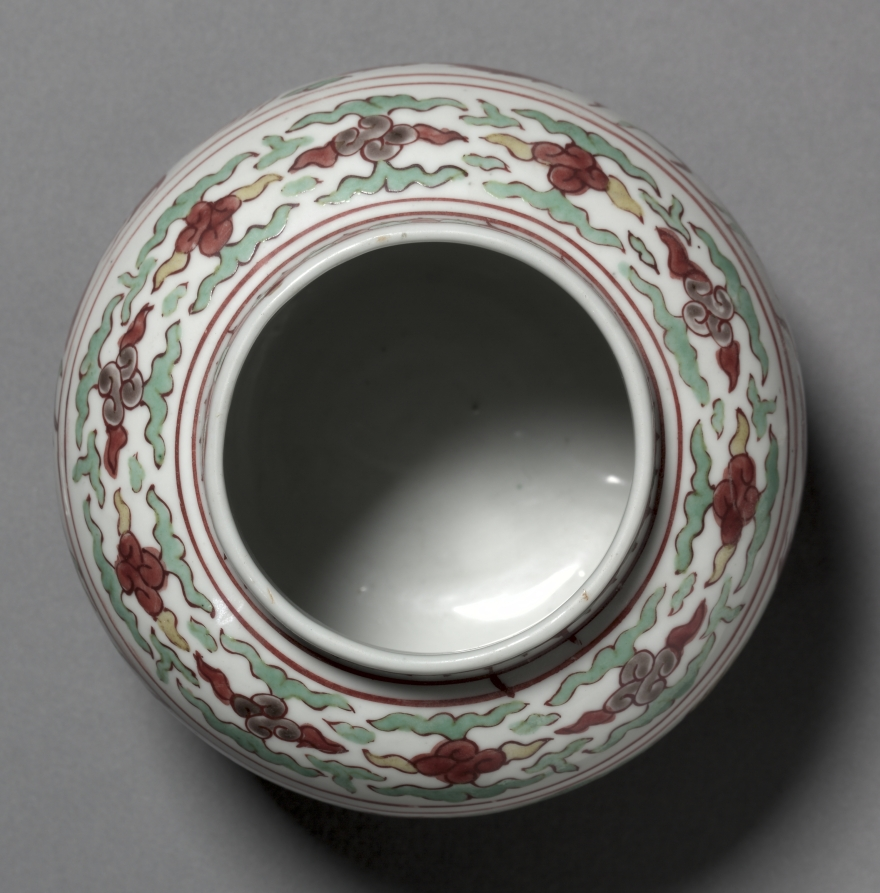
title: Jar with Dragons Pursuing Flaming Jewels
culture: China, Jiangxi province, Jingdezhen kilns, Ming dynasty (1368-1644), Jiajing mark and reign (1522-66)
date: 1522–66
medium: procelain with wucai (five color) overglaze enamel decoration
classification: Ceramic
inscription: 大明嘉靖年製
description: The exterior of this jar is ornamented with two rampant five-clawed dragons boldly drawn in rouge de fer. The dragons are in pursuit of the sacred jewel amid cloud scrolls in green and yellow, flanked at the top and bottom with broad registers of cloud scrolls and gadroons. The underfoot is glazed and bears a six-character nianhao in the form of a vertical mark reading "Daming Jiajing nianzhi," enclosed in double rings in underglaze cobalt blue.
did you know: The interior is glazed white porcelain.